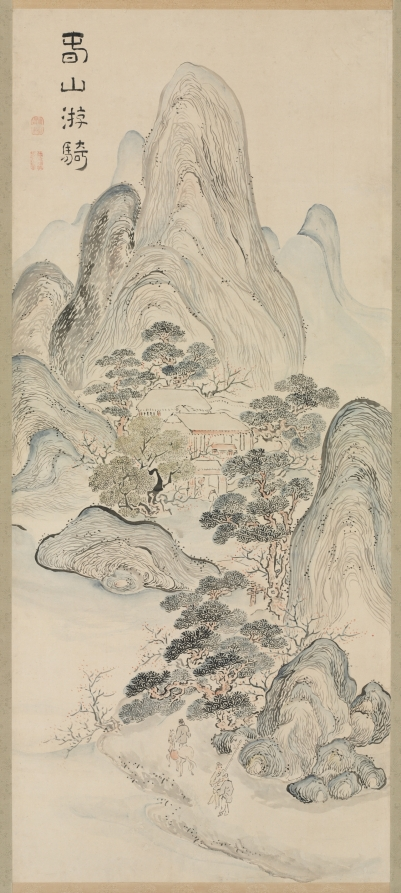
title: Spring Landscape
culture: Japan, Edo period (1615–1868)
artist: Ike Taiga (Japanese, 1723–1776)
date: 1700s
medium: hanging scroll; ink and color on paper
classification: Painting